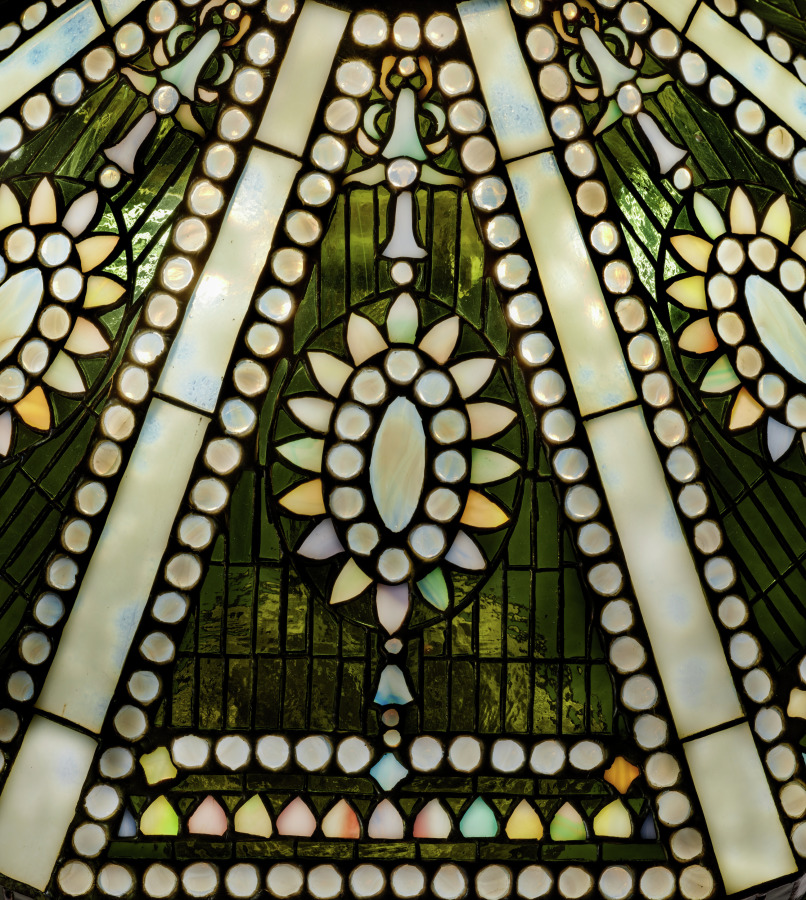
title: Empire Table Lamp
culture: America, New York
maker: Tiffany Studios (United States, New York, 1902–32)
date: c. 1902–10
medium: Leaded glass, gilt bronze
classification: Lamp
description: Although Tiffany often wrote of his disdain for romanticizing the past, he recognized that many of his customers favored historical styles. He kept his showrooms well stocked with colonial revival furniture and lamps, such as the Napoleon-inspired Empire pattern, with its abstracted neoclassical swags and medallions, that fit easily within traditional decor.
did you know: The row of little green glass tiles at the bottom edge of this shade is meant to resemble a row of silk fringe.